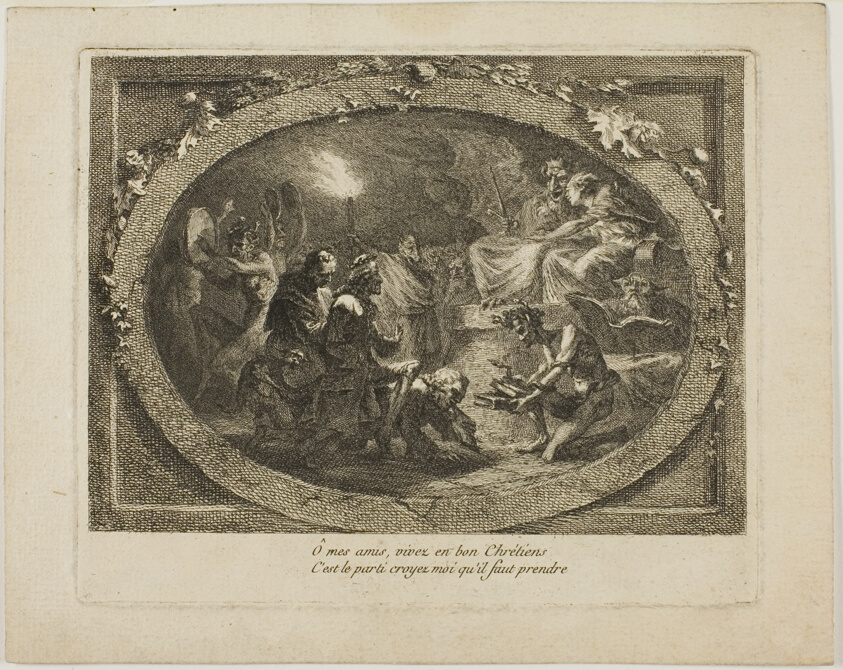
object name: Print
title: Voltaire Arriving in Hell Riding Jean-Jacques Rousseau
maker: Unknown artist (French, 18th century)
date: c. 1778-80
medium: Etching on cream laid paper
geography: France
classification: etching; print; prints and drawing